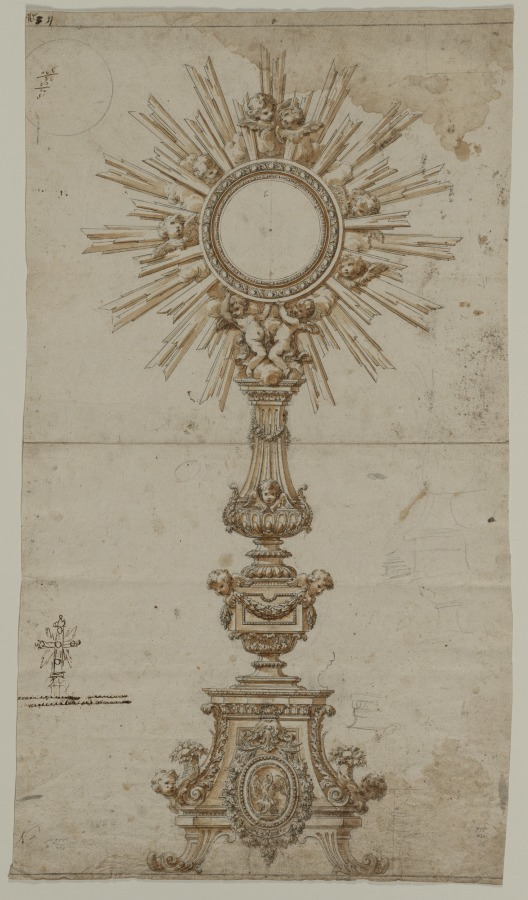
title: Design for a Monstrance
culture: Italy, Turin, 17th century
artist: Anonymous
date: 1600s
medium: pen and brown ink (ruled in places) and brush and brown wash, with graphite, traces of brush and gray and pink wash, and stylus; framing lines in graphite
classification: Drawing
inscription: upper left, in brown ink: N° 4 ; upper left, in brown ink: 16 / [illegible]0 [underlined] / 00 / 32 [underlined] / 3[illegible]6 [all upside down] ; upper right, in graphite: Principio ; lower left, in brown ink: [illegible] [crossed out in brown ink] ; lower left, in brown ink: N [underlined twice] ; lower left, in graphite: 755 [underlined] / 430 ; lower right, in graphite: Fine ; lower right, in graphite: 755 / 430 / 1/6 ; VERSO, upper center, in brown ink: t [shape of a cross] ; upper left, in graphite: [illegible] ; upper left, in graphite: osss ; across bottom, in brown ink: [long series of numbers, sideways] ; lower center, in brown ink: [illegible, masked] ; lower right, in graphite: [series of numbers, upside down] ; lower right, in black ink: 5 [sideways, circled]